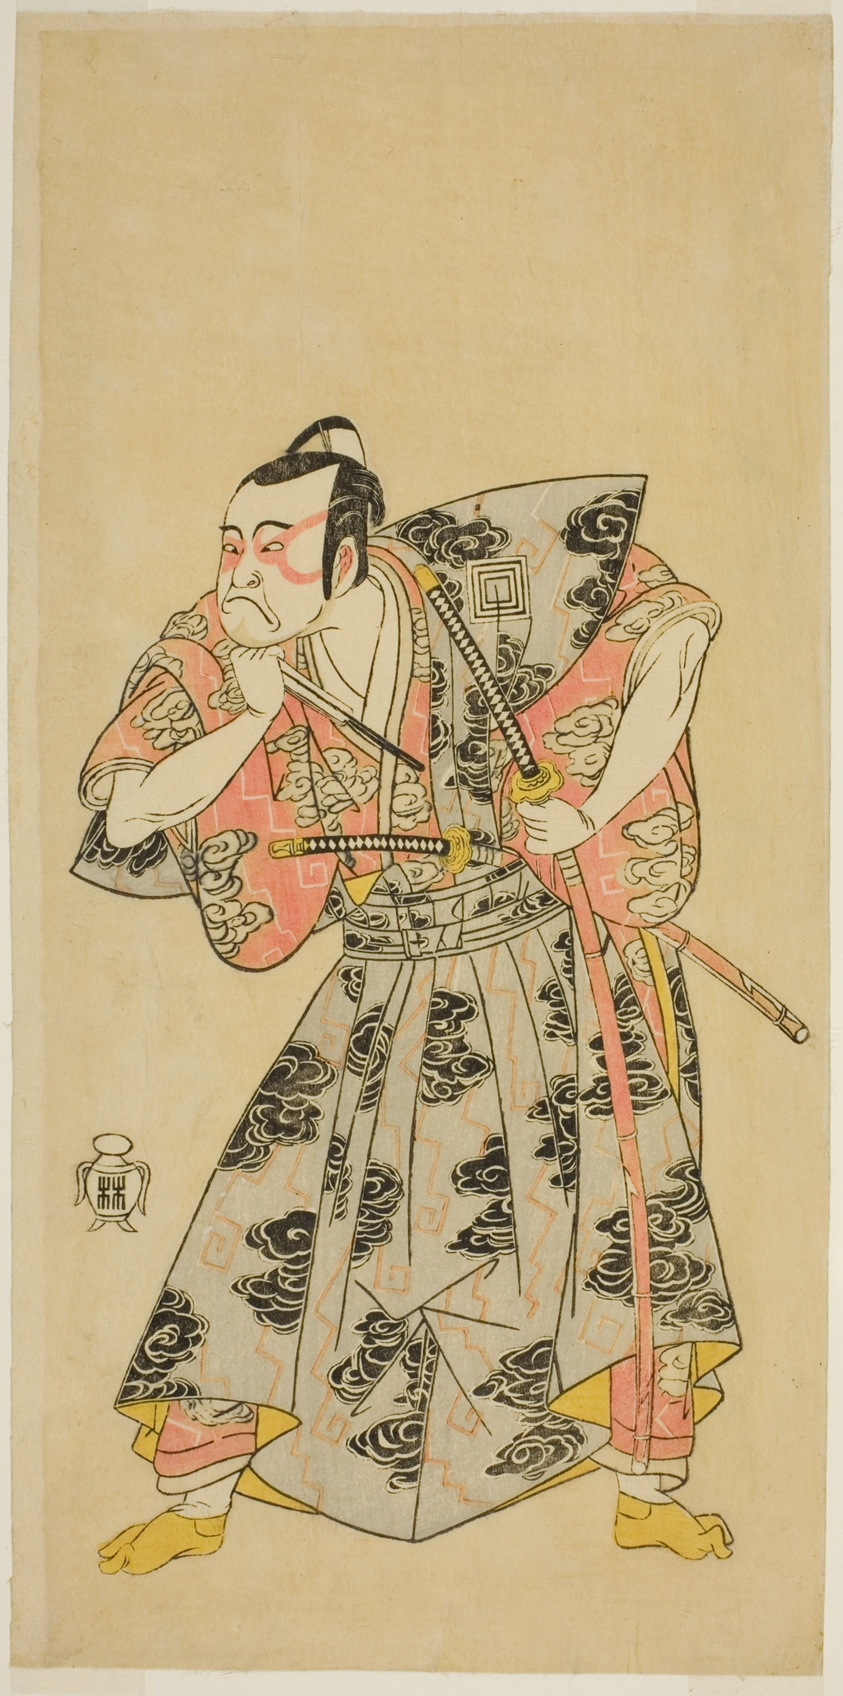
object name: Print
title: The Actor Ichikawa Danzo III as Fuwa Banazemon in the Play Date Moyo Kumo ni Inazuma, Performed at the Morita Theater in the Tenth Month, 1768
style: Japanese (culture or style)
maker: Katsukawa Shunsho 勝川 春章; Japanese, 1726-1792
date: c. 1768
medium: Color woodblock print; hosoban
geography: Japan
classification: woodblock print; print; asian art